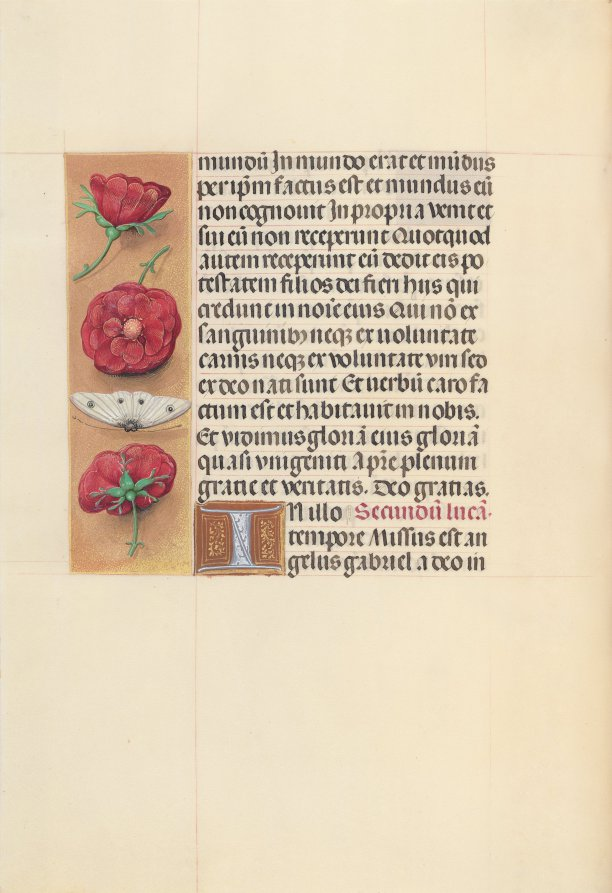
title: Hours of Queen Isabella the Catholic, Queen of Spain: Fol. 93v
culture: Flanders, Ghent and Bruges, late 15th century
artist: Master of the First Prayerbook of Maximillian (Flemish, c. 1444–1519)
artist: and Associates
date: c. 1500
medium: ink, tempera, and gold on vellum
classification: Bound Volume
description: This manuscript was illuminated by a circle of at least five highly organized manuscript painters active in the Flemish cities of Ghent and Bruges. The principal illuminator was Alexander Bening, who painted the majority of the book's miniatures. Manuscripts produced by this circle of artists are renowned for the decoration of their borders, which typically feature a rich variety of realistically-painted flowers, birds, and butterflies. This prayer book, called a book of hours, was intended not for a cleric, but for the private devotions of a lay person-in this case, Isabella the Catholic, Queen of Spain (1451-1504). Isabella's coat of arms embellishes the book's frontispiece. It is unlikely that the book was commissioned by the Queen herself; rather, she probably received it as a diplomatic gift from someone courting her patronage, perhaps Cardinal Francisco Jimenez de Cisneros. A Franciscan friar, Jimenez was dependent upon Isabella for his advancement, first to the post of Queen's confessor in 1492, and then to Archbishop of Toledo in 1495.